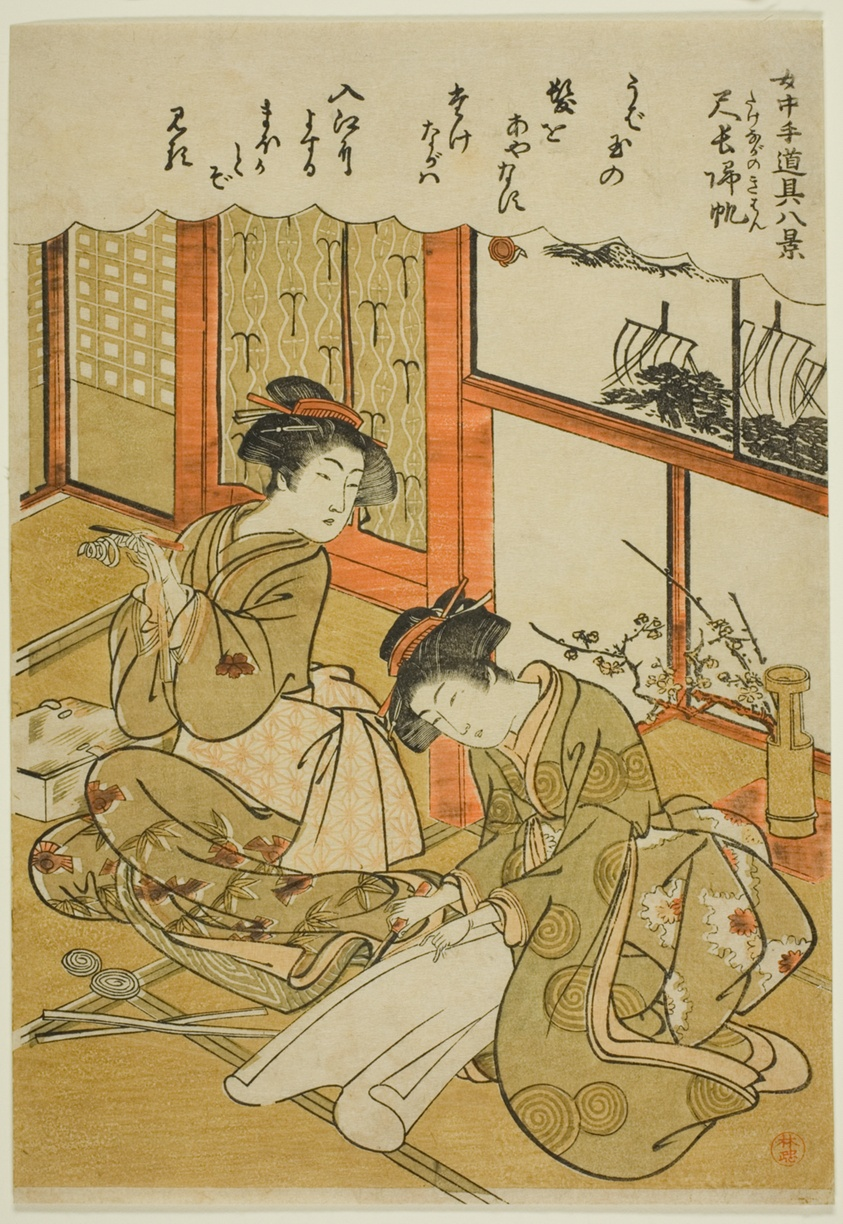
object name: Print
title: Returning Sails of the Bamboo Knives (Takenaga no kihan), from the series ”Eight Views of Maids' Utensils (Jochu tedogu hakkei)"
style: Japanese (culture or style)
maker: Attributed to Kitao Masanobu (Santo Kyoden); Japanese, 1761–1816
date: late 18th century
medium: Color woodblock print; chuban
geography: Japan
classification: woodblock print; print; asian art